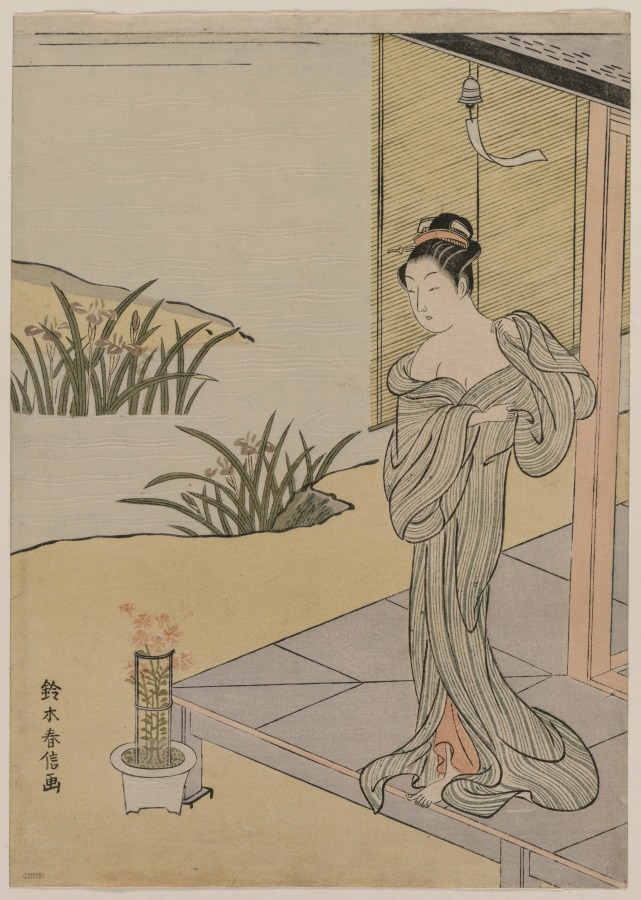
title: Young Woman Looking at a Pot of Pinks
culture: Japan, Edo period (1615–1868)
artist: Suzuki Harunobu (Japanese, 1724–1770)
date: c. 1767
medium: color woodblock print, with embossing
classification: Print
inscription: Signature: Suzuki Harunobu ga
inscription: Collector's Seal: Vever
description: A girl steps onto a veranda after a bath to look at a pot of pinks. A warm breeze stirs the poem-strip tied to the windbell above her. Irises bloom in the pool in the background. The print has been identified as the summer subject in a set of four flowers representing each season and is considered to be one of Harunobu’s most enchanting designs. One of the most celebrated and productive of all ukiyo-e artists, Harunobu is widely recognized as the first Japanese printmaker to create designs by printing each color in the image with a different block. These prints came to be known as nishiki-e, or brocade pictures, suggesting their resemblance to the gorgeous brocades worn at the time. The embossing on the waves in the stream and on the flowers was created by using unpigmented blocks during the printing process.